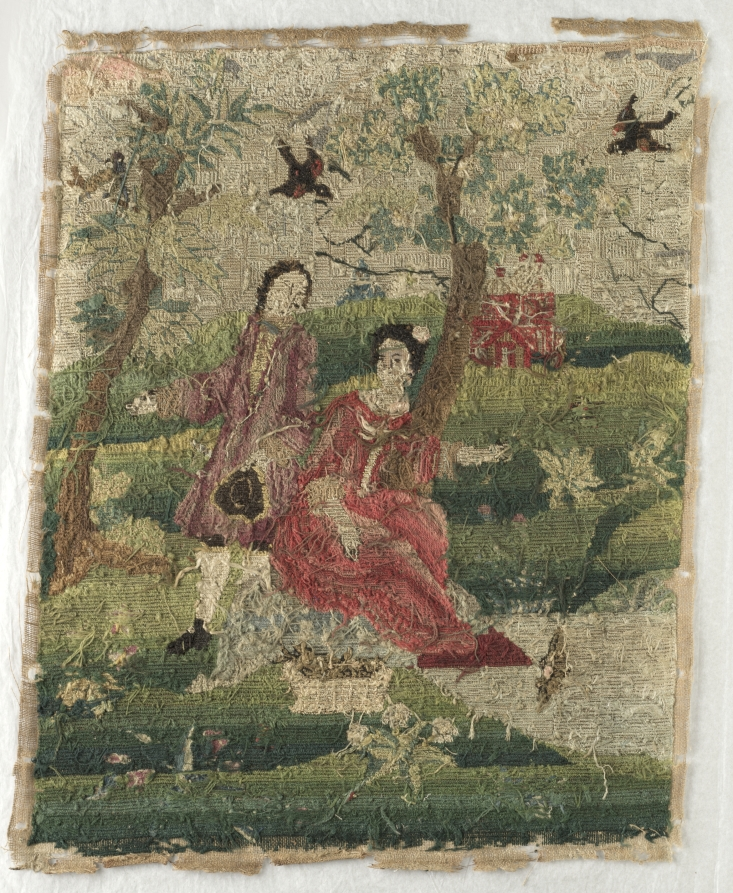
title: "Fishing Lady"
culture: America, Massachusetts, Boston, 18th century, 1st half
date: 1700s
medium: plain weave linen? with embroidery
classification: Embroidery